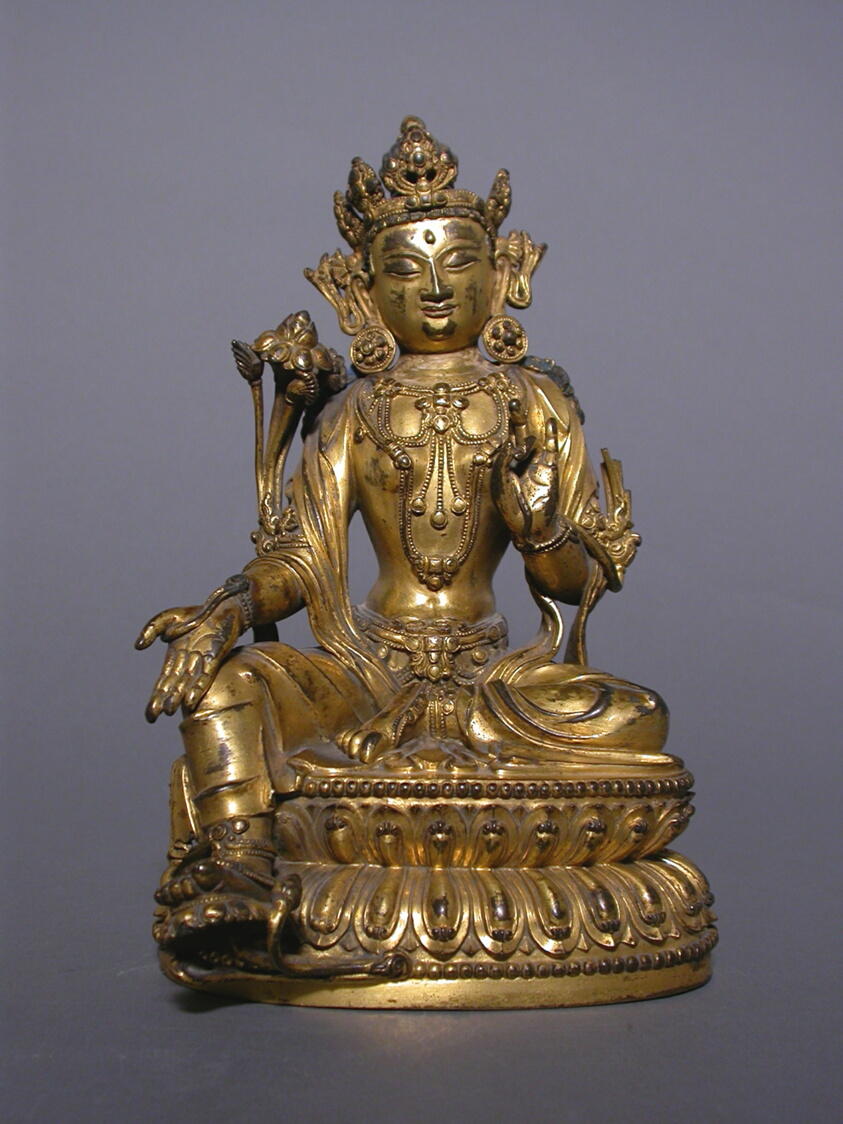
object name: Sculpture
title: Green Tara, Seated in Pose of Royal Ease (Lalitasana), with Lotus Stalks on Right Shoulder and Hands in Gestures of Reasoning (Vitarkamudra) and Gift Conferring (Varadamudra)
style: Chinese (culture or style)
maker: China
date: Ming dynasty (1368–1644), Yongle reign mark and period (1403–24)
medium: Gilt copper alloy with traces of pigment (lapis lazuli)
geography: China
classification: bronze; metal; sculpture; asian art